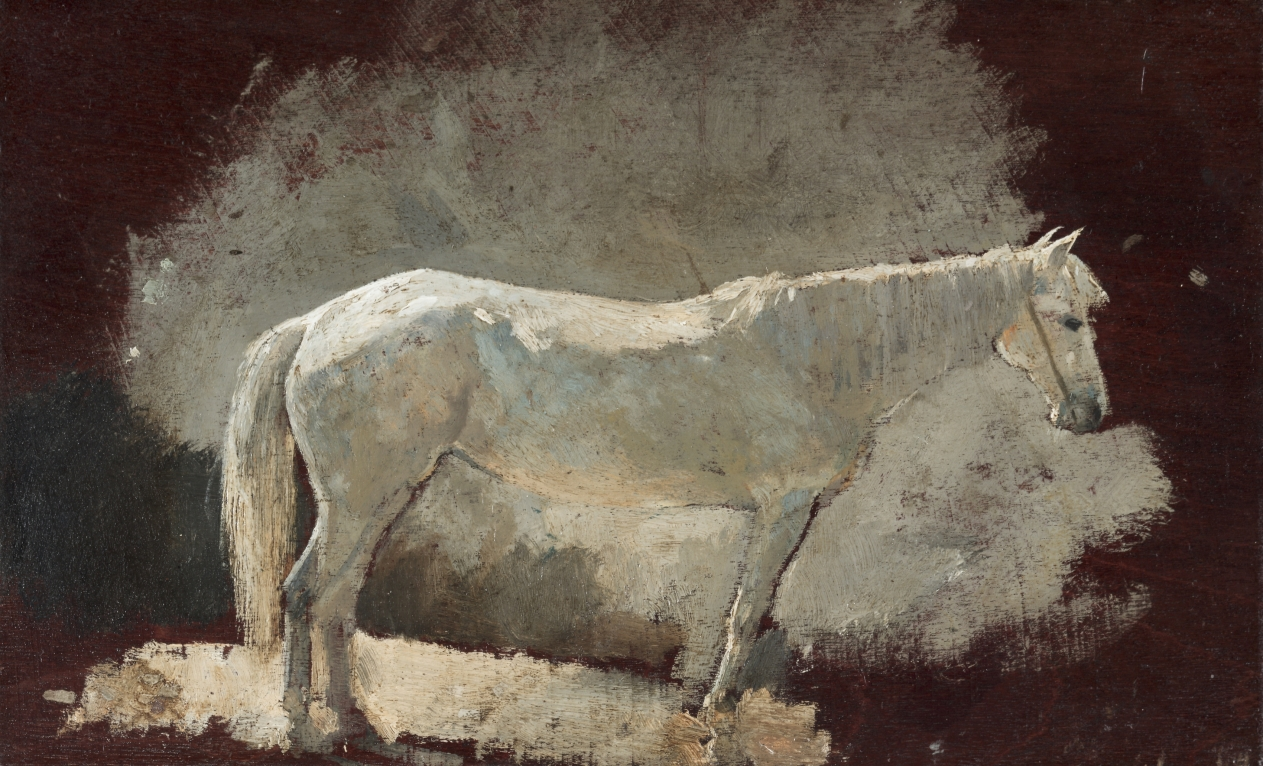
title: White Mare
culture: America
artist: Winslow Homer (American, 1836–1910)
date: c. 1868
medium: oil on panel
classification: Painting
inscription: no signature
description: In August 1868 Winslow Homer, then working as a free-lance illustrator, visited the White Mountains of New Hampshire. As early as the 1820s, American artists used the White Mountains as a setting for landscape paintings. Unlike Thomas Cole (1802-1848) and Asher Durand (1796-1886), who focused on the unspoiled wilderness, Homer turned his attention to other tourists. He made this oil sketch as a study for the horse in a large oil painting The Bridal Path, White Mountains (1868; Sterling and Francine Clark Art Institute, Williamstown, Massachusetts).